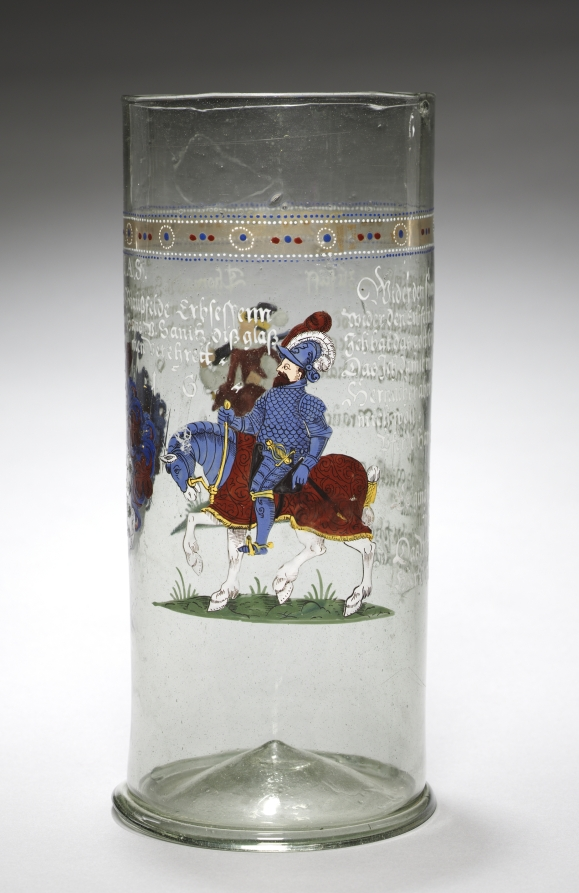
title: Beaker ("Welcome Glass") with Arms and Inscriptions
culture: Germany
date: 1616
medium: enameled glass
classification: Glass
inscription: THOMAS V. SANITZ ZU BRAUSZFELDE ERBSESSENN HABE MEINEN VETTER HANS V. SANITZ DISZ GLASZ ZUM WILLKOMMEN VEREHRETT. (Thomas von Sanitz has given this glass to my cousin, Hans von Sanitz, in welcome.)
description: The inscription tells that this beaker was given by Thomas V. Sanitz zu Brausfelde Erbsessen to welcome his cousin Hans V. Sanitz.